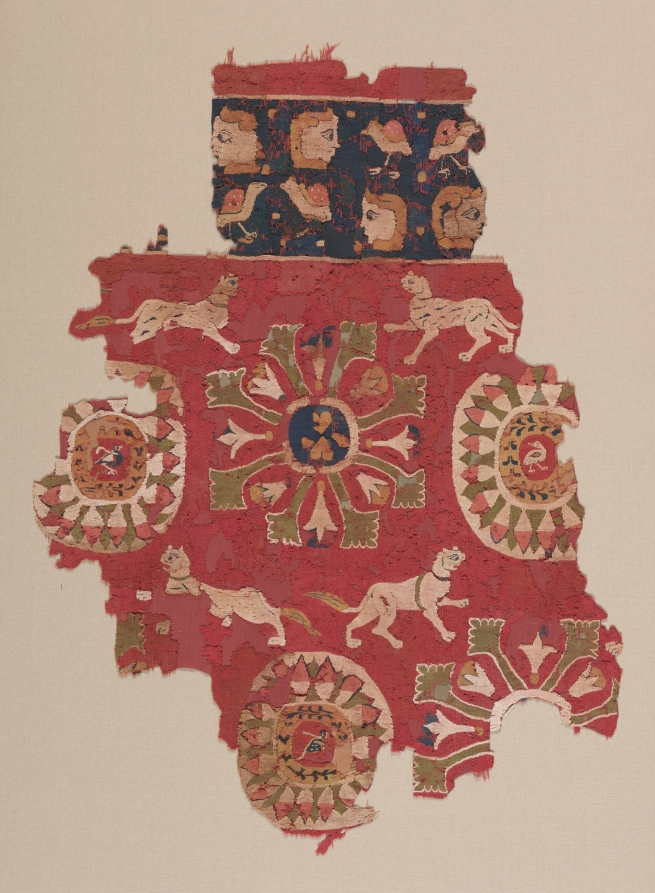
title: Curtain Fragment with Panthers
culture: Egypt, Antinoë, Byzantine period, late 6th century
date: 500s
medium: Dyed wool, undyed linen: slit-tapestry weave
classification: Textile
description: Luxurious tapestry-woven curtains decorated with colorful figures and flora were hung in religious, palatial, and theatrical settings. Often, as here, red forms the background of the main field framed by a blue border. Lively cheetahs or panthers wearing collars appear among alternating stylized rosettes and floral roundels that frame birds on the red ground. In the border, pairs of masks and birds alternate. Cheetahs were favored for hunting, suggested here by the collars and, in one case, a harness. Panthers, on the other hand, were associated with Dionysus, Greek god of wine, who was admired by Egyptian people of all religions through the 500s CE.